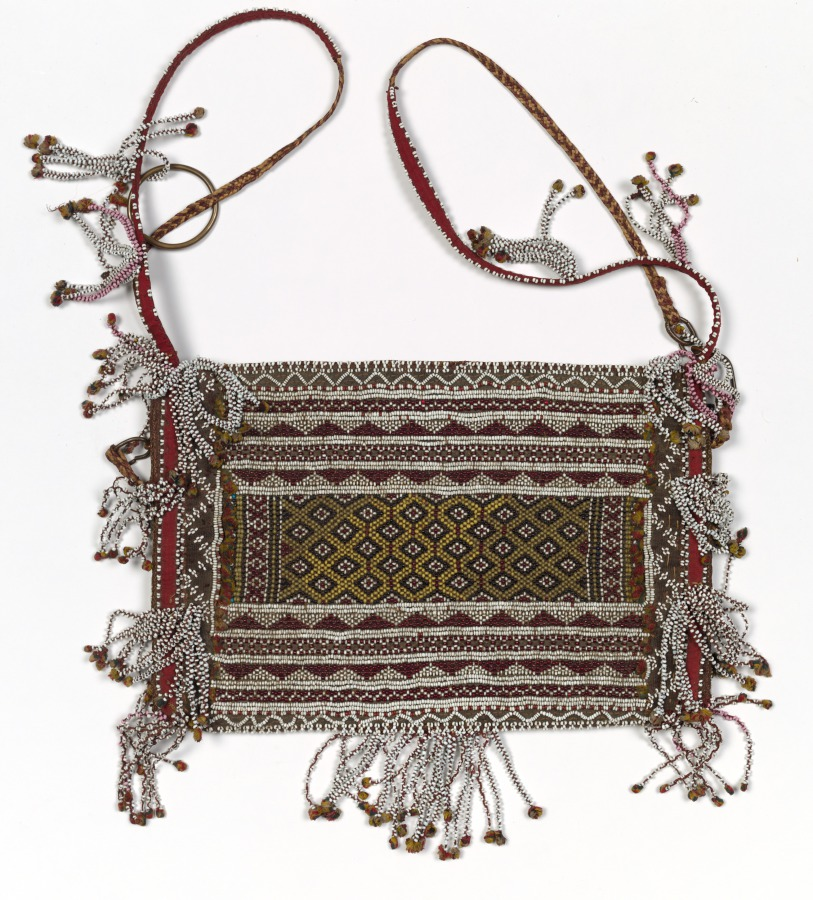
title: Backpack (Bagobo people)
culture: Philippines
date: early 1900s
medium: Handwoven abacá cloth, printed cotton cloth, abacá fiber (braided/plaited cordage), glass beads, metal sequins, metal rings, fiber tassels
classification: Textile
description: This backpack for men is constructed from a single length of handwoven abacá cloth, woven in a warp-faced plain weave with supplementary weft patterning. The beadwork uses glass beads of various colors arranged in geometric bands and diamond motifs characteristic of the Bagobo people. Two shoulder straps, constructed from braided abacá fibers overlaid with cotton cloth and embellished with beads and metal sequins, are attached through metal rings.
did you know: Ethnographic photographs document backpacks like this one being worn by Bagobo men in ceremonial or formal contexts.